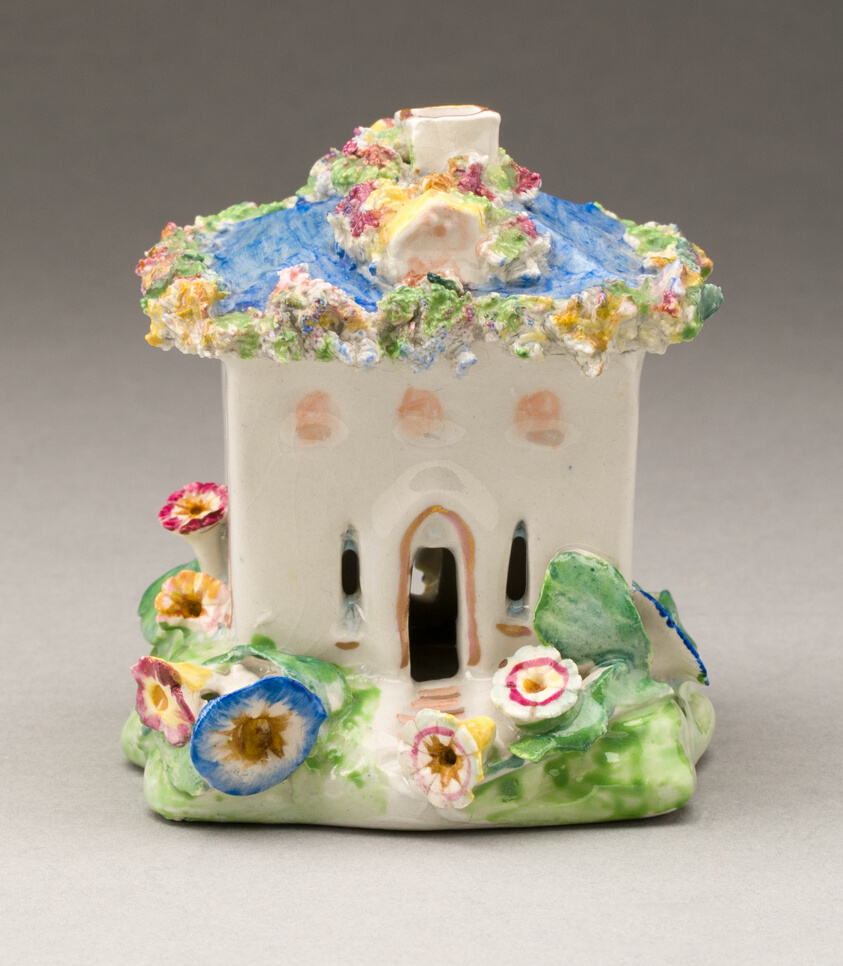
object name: Ceramics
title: Incense Burner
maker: England, Staffordshire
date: c. 1830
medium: Glazed earthenware with polychrome enamel decoration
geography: Staffordshire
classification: ceramics